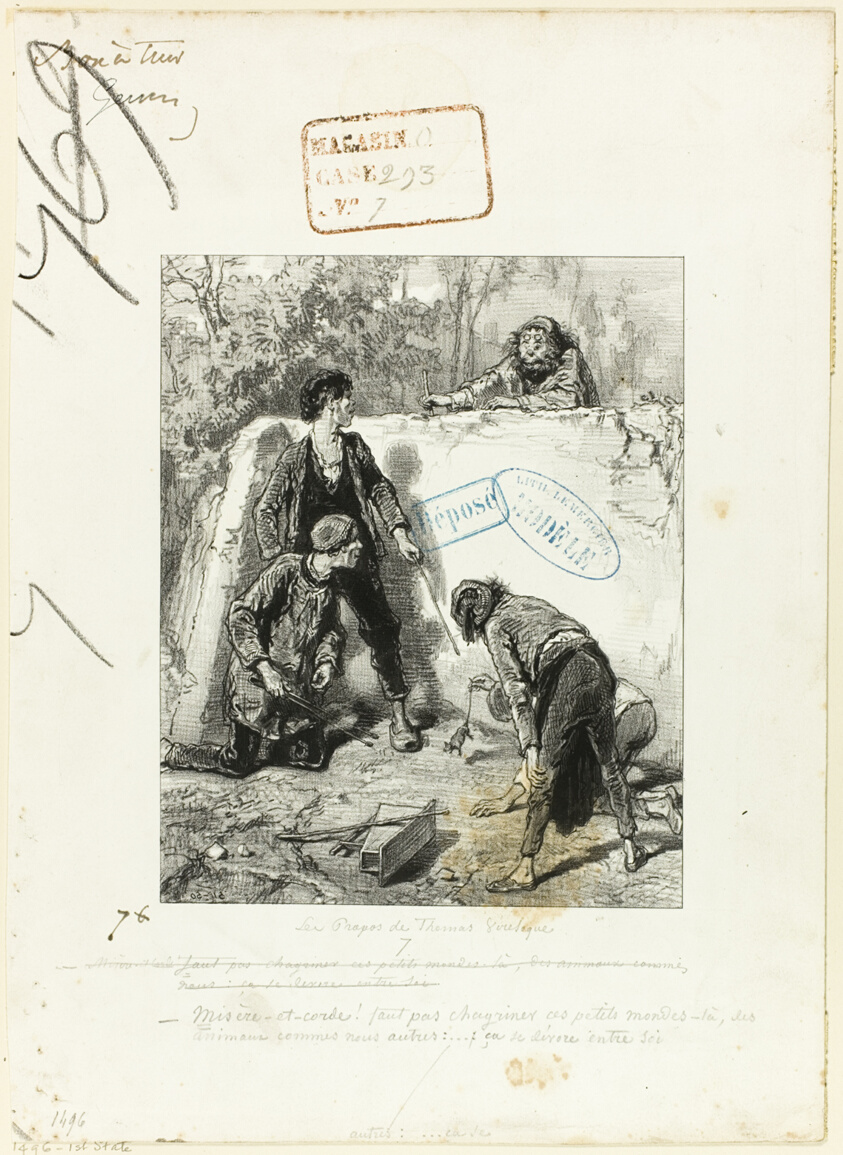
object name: Print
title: Les Propos de Thomas Vireloque: Misère-et-corde!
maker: Paul Gavarni (French, 1804-1866)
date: 1852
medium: Lithograph in black on cream wove paper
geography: France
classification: lithograph; print; prints and drawing